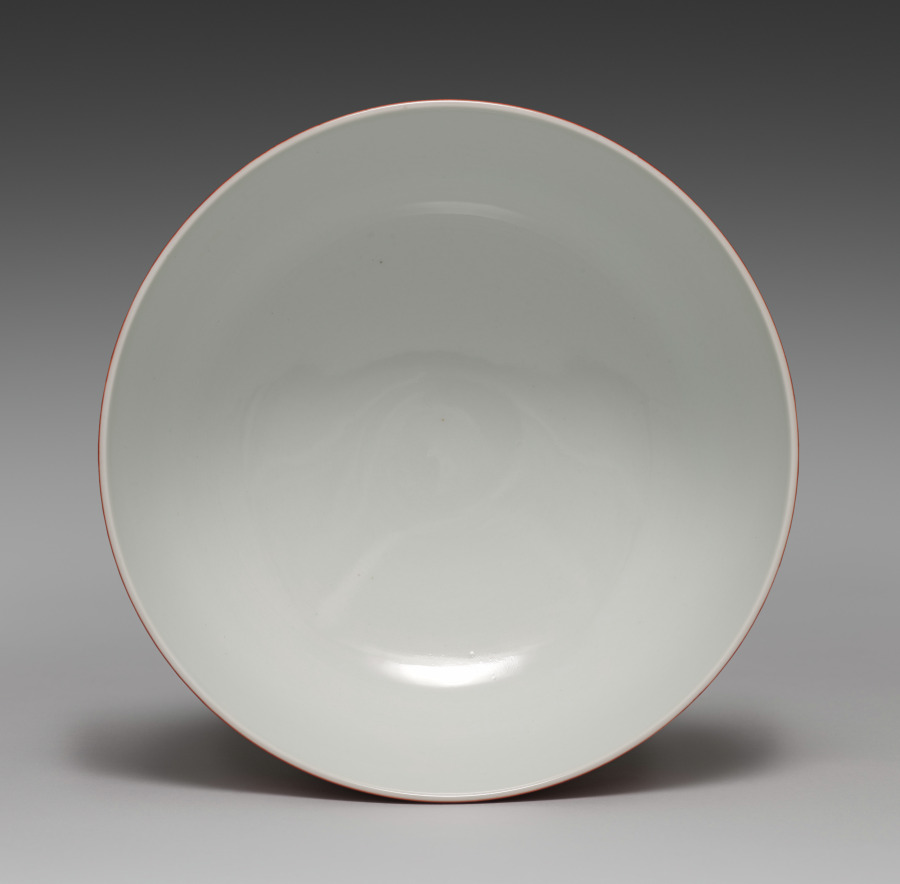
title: Sweets Bowl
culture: Japan, Taishō period (1912–26) or Shōwa period (1926–89)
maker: Seifū Yohei IV (Japanese, 1872–1951)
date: 1914–46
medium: Porcelain with coral red glaze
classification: Ceramic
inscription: 清風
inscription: 成山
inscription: 清風造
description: Like his father, Yohei IV also produced works with red monochrome glazes, like this red coral–glazed sweets bowl with white interior.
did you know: Seifū Yohei IV was active at home and abroad and won international recognition for his ceramic's glazes and designs.